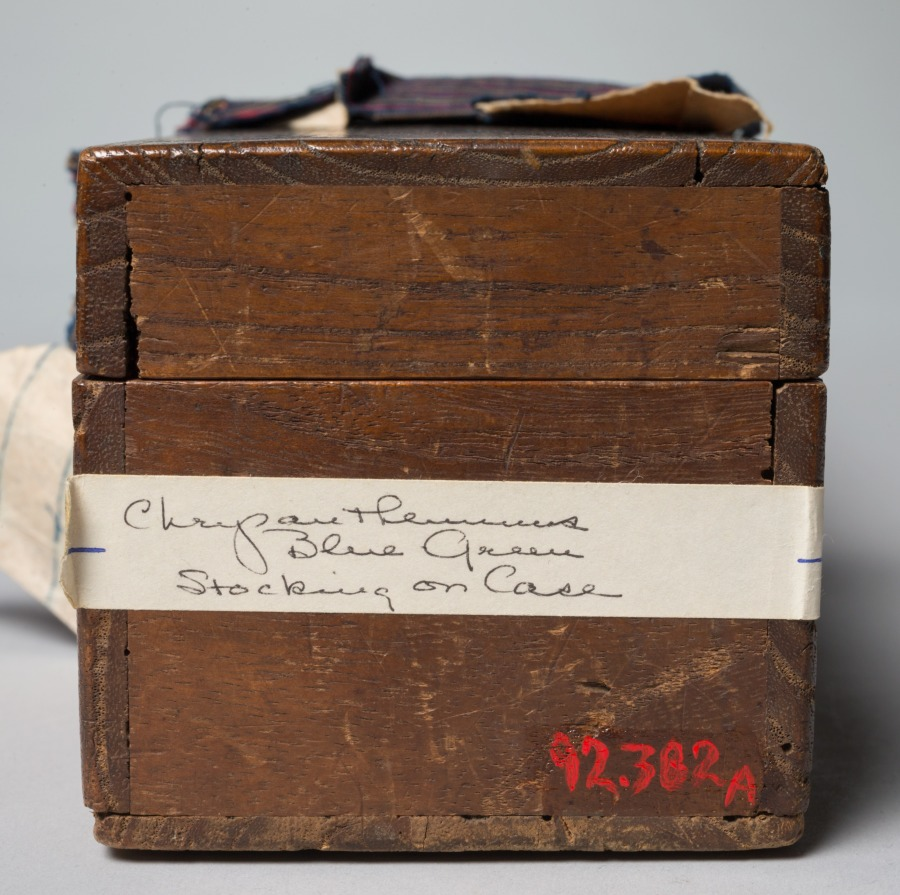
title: Puppy with Dandelions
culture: Japan, Edo period (1615–1868)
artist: studio of Tawaraya Sōtatsu (Japanese, c. 1570–c. 1640)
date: 1600–1640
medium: hanging scroll; ink on paper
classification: Painting